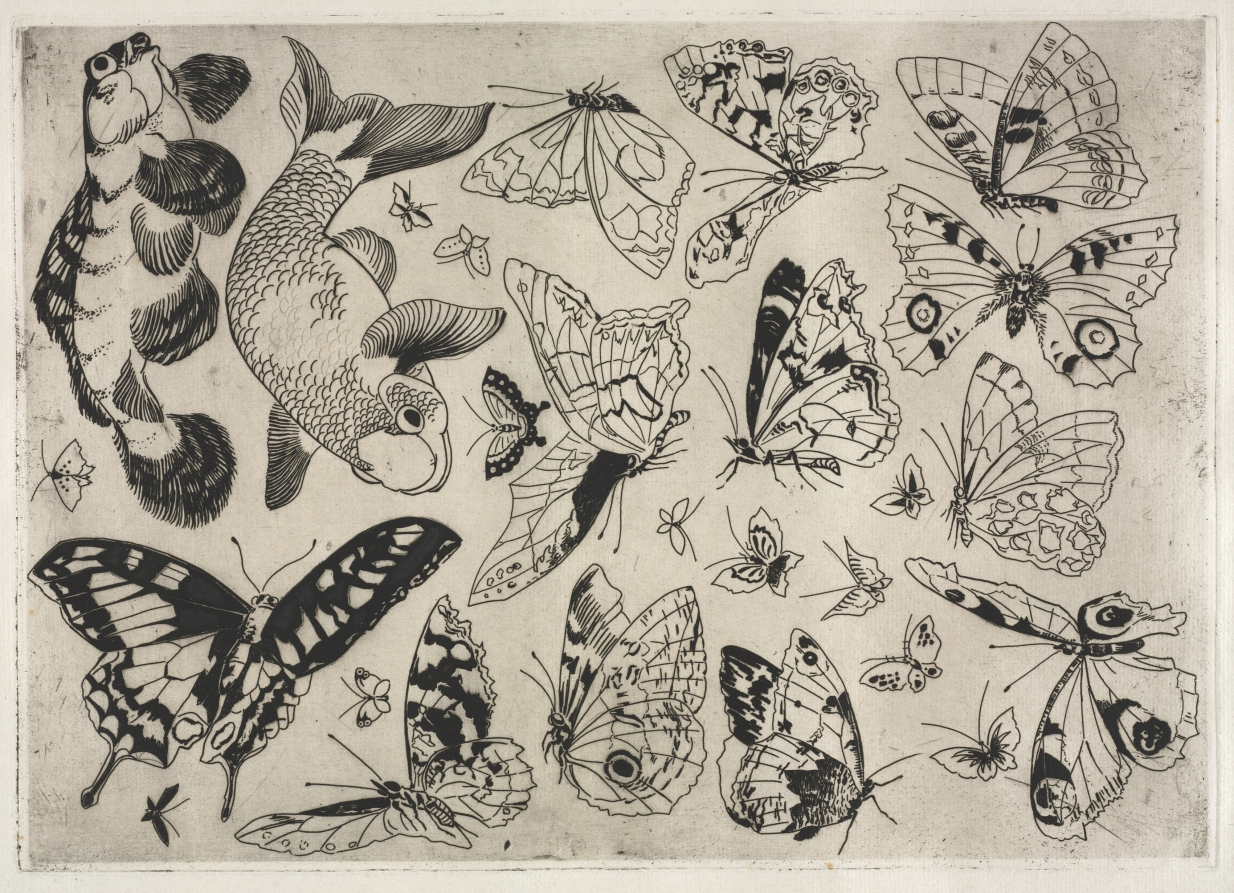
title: Dinner Service (Rousseau service): Butterflies and Fish (no. 16)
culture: France, 19th century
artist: Félix Bracquemond (French, 1833–1914)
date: 1866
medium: etching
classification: Print